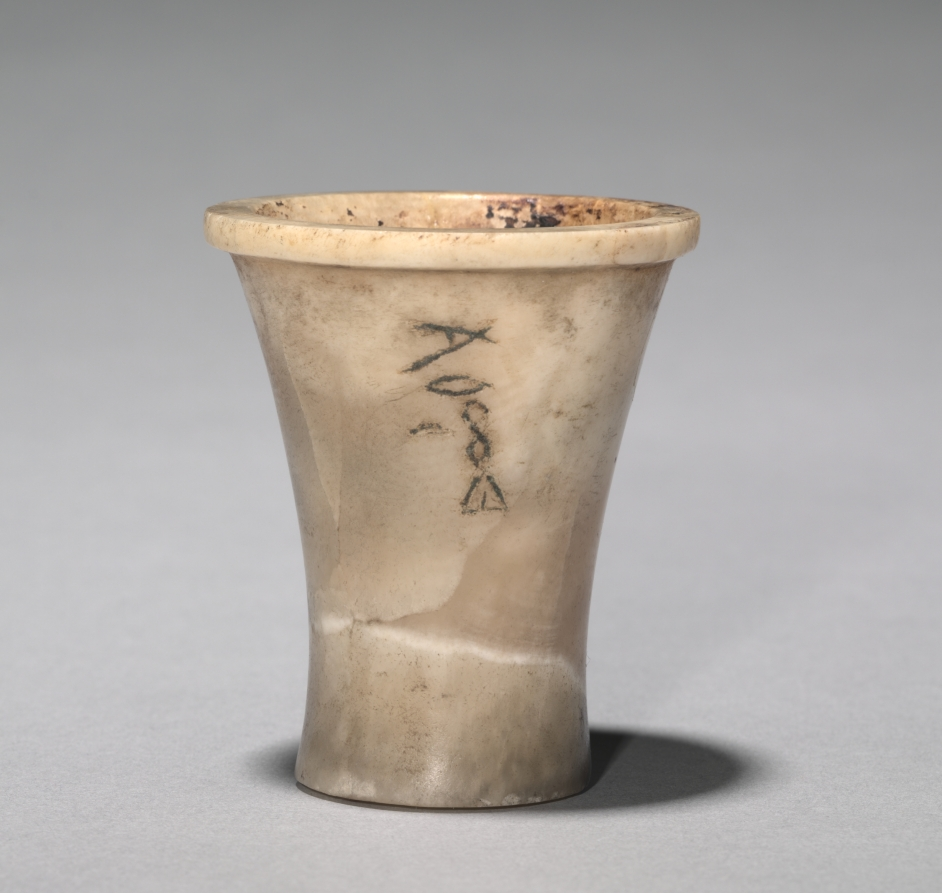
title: Cosmetic Vessel (Cylinder Beaker)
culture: Egypt, Middle Kingdom (2040–1648 BCE), Dynasty 12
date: 1980–1801 BCE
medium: travertine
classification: Vessels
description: Jars of this shape and material are common in Middle Kingdom tombs. This one, however, is inscribed with the Egyptian word merhet, which means "perfumed oil," and after thousands of years it still has traces of sweet-smelling resin.